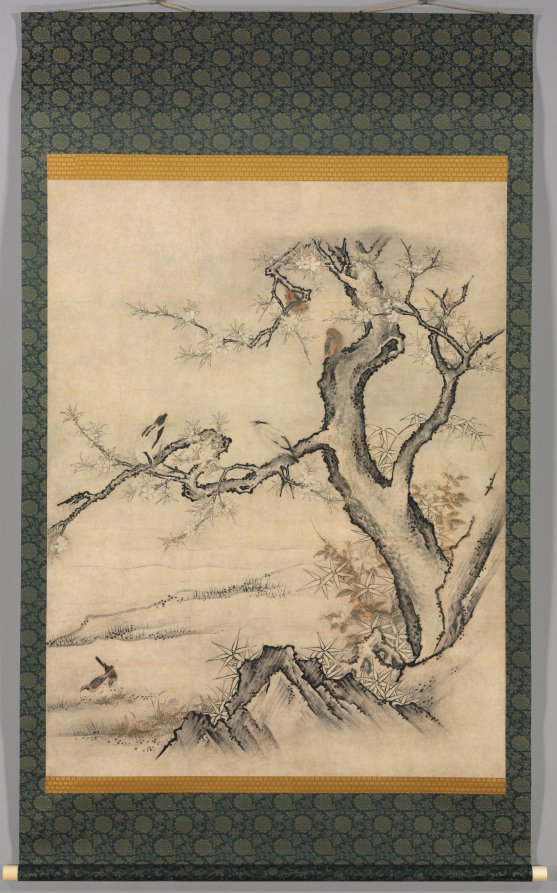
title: Flowers and Birds in a Spring Landscape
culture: Japan, Muromachi period (1392–1573)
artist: attributed to Kano Motonobu (Japanese, c. 1476–1559)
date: 1500s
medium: One of a set of sliding door panels mounted as hanging scrolls; ink and color on paper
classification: Painting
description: These four paintings originally decorated sliding doors that partitioned the interiors of Japanese buildings. Painters from the Kano school, named after the artist Kano Motonobu (1476–1559), were major forces in the production of screens and architectural interiors in Kyoto. When he headed the workshop, his work was prized by the upper strata of society. Kano is credited with combining the subtlety of Chinese black ink painting, as seen in the rocks and hills, with the color and realism of Japanese painting, seen in the birds and flowers. Landscape scenes like this were prized by the elite of Kyoto, both for their contemplative aesthetic and their patrons’ refined taste.